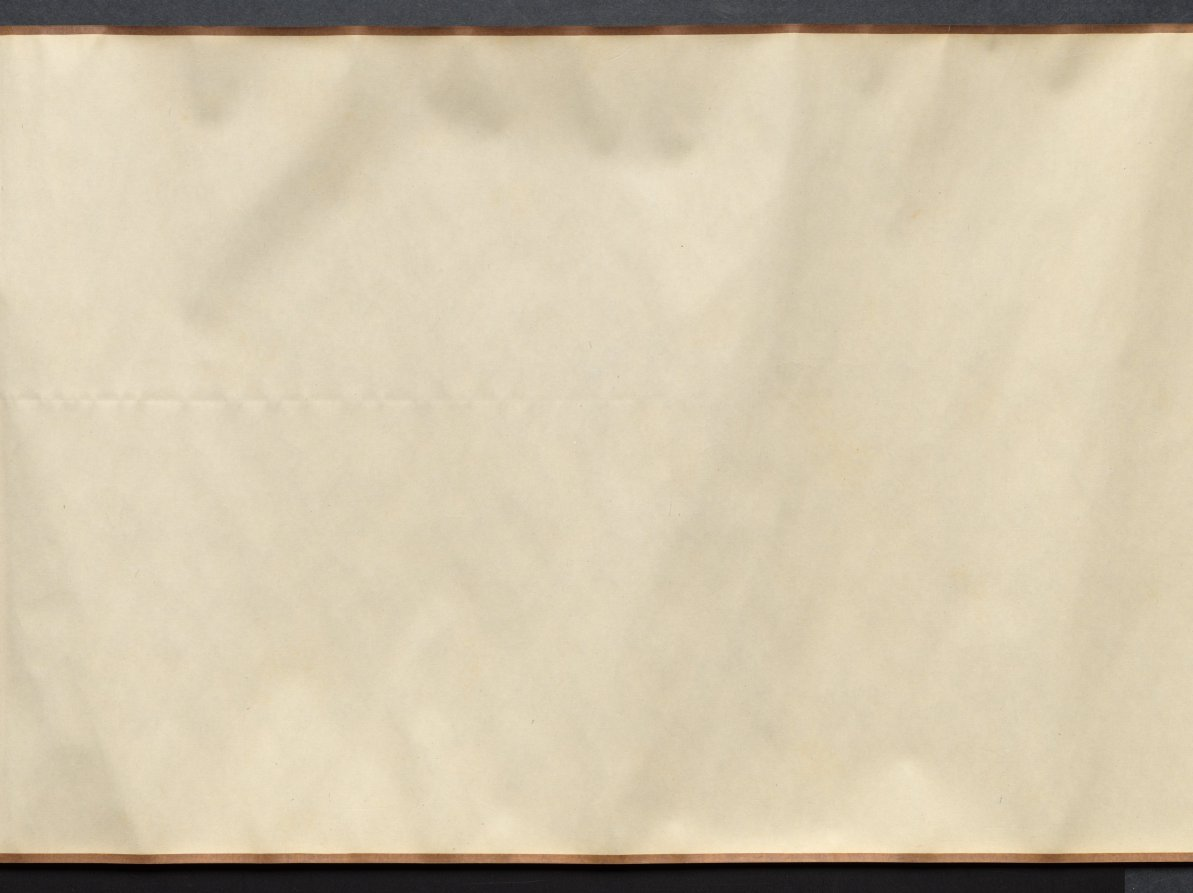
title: Returning to the Village in a Rainstorm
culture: China, Ming dynasty (1368–1644)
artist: Xie Shichen (Chinese, 1487–after 1567)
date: 1530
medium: Handscroll; ink and light color on silk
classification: Painting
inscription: 風雨歸村圖 嘉靖庚寅秋日樗仙謝時臣. [印] 謝時臣印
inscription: 3 additional seals unidentified.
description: This scroll depicts a wind- and rainswept landscape with figures in the countryside struggling against a late summer monsoon rainstorm. Such weather was familiar to residents of the lower Yangzi delta. Xie Shichen spent most of his life in the Suzhou area. Details of his career are scant, but his surviving works suggest that he made his living as a professional painter. This painting conveys drama and anecdotal observations, characteristic of Zhe school paintings, such as the one by Lü Wenying, CMA 1970.76.